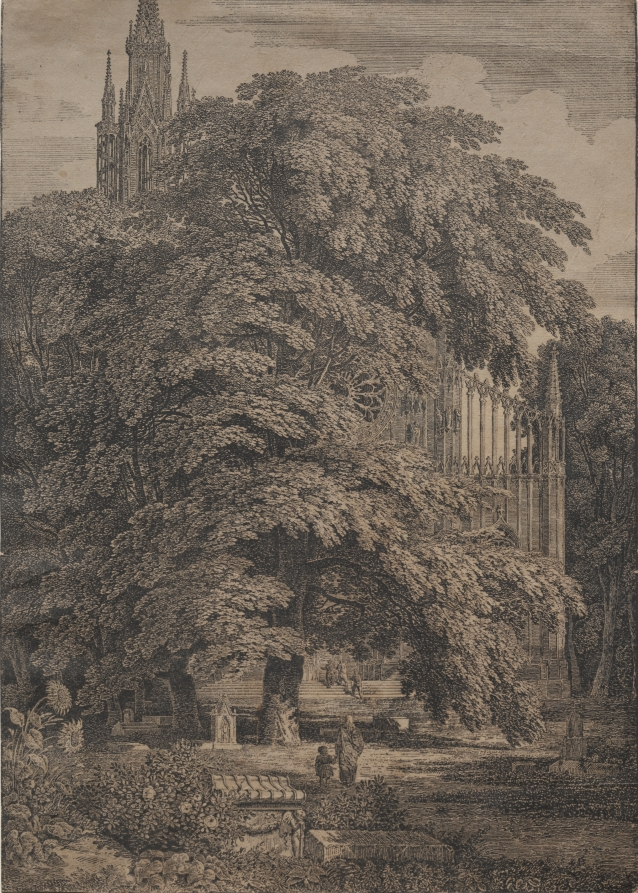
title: Gothic Church among Oaks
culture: Germany, 19th century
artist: Karl Friedrich Schinkel (German, 1781–1841)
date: 1810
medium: lithograph with tint stone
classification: Print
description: Schinkel was the principle German architect of the first half of the 19th century. Responsible for almost every public building in Berlin, his neoclassical buildings for the city, based on the rational order and classic proportions of antiquity, came to define the power and stability of the Prussian capital. Schinkel also had a career as a painter and printmaker in which he developed his ideas of architectural splendor in landscapes that juxtaposed nature with buildings. The theme of the visionary Gothic cathedral pervades his work. Gothic Church among Oaks combines the principal Romantic tenets of Christianity, nature, patriotism, and medievalism into one image. Here, as in Quaglio’s Outer Staircase of a Gothic Ruin, a small child is contrasted with the enormity of the oak and the Gothic ruin. The continuity of life in the midst of death is signified by the sunflower among gravestones.